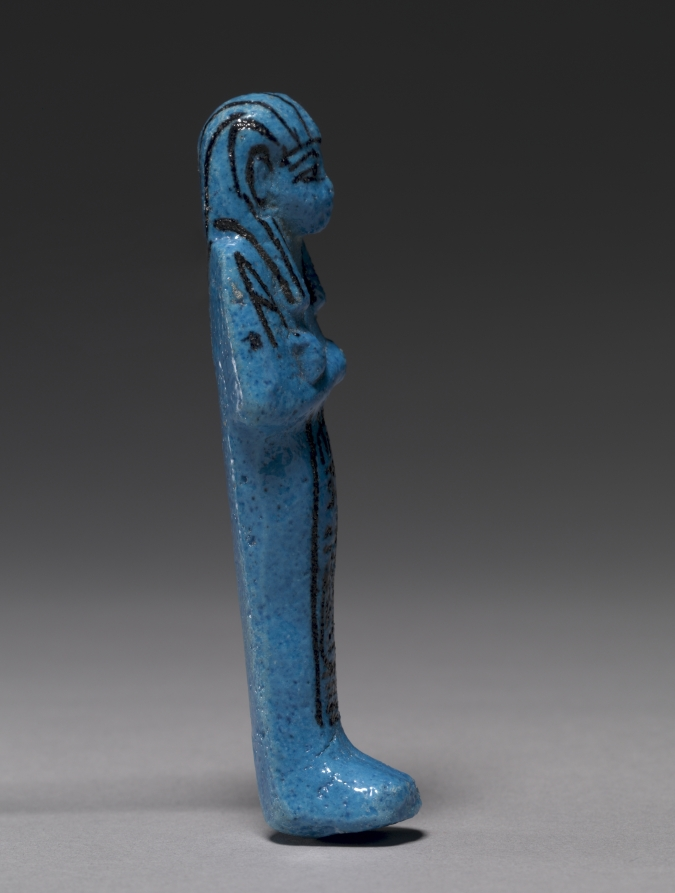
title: Shawabty of Pinudjem I, High Priest of Amen and King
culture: Egypt, Third Intermediate (1069–715 BCE), Dynasty 21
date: c. 990–969 BCE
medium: bright blue faience with purple details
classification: Funerary Equipment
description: This small mummiform funerary figurine was a surrogate for the deceased that performed menial tasks for its owner in the afterlife. Mold-made and decorated with paint, this shawabty contains the name of a king within a cartouche. The vibrant blue color occurs during the firing process as a chemical reaction with the pigments in the faience paste, in this case added copper.